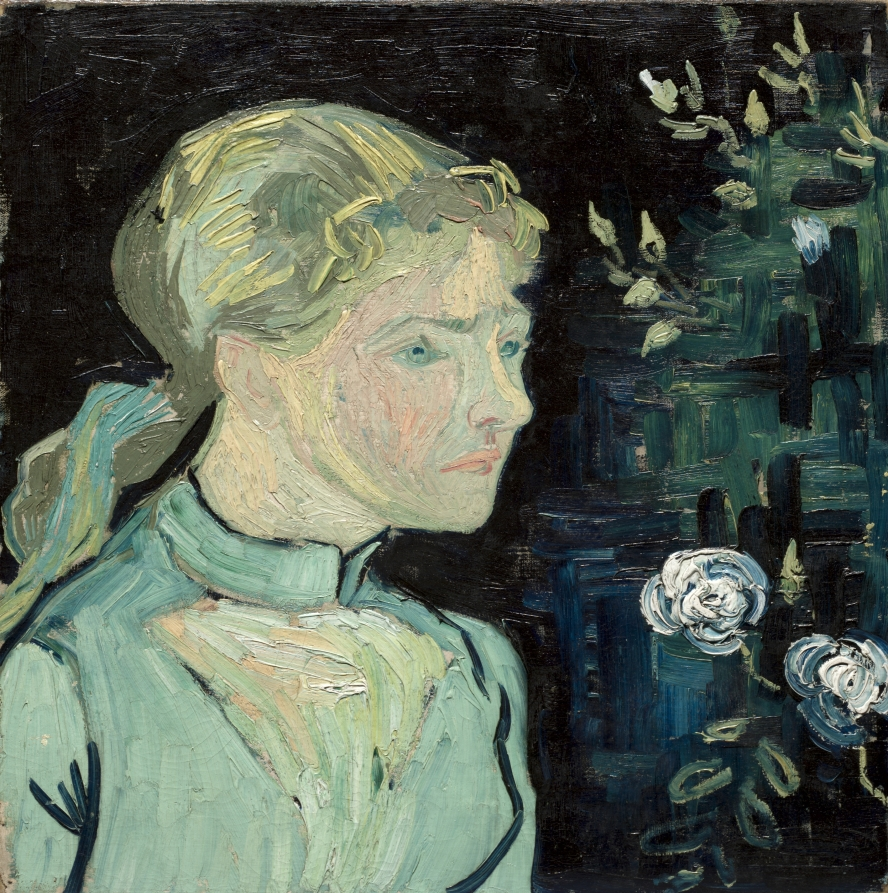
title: Adeline Ravoux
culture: Netherlands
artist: Vincent van Gogh (Dutch, 1853–1890)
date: 1890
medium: oil on fabric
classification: Painting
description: In May 1890, Vincent van Gogh arrived in Auvers, a small town north of Paris, where he rented a room at the inn of Arthur Ravoux. This portrait, completed during the last months of the artist’s life, depicts Ravoux’s 13-year-old daughter, Adeline. Van Gogh wrote that rather than photographic resemblance, he wanted his portraits to convey the “impassioned aspects” of contemporary life through the “modern taste for color.”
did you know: Adeline Ravoux, at age 13, was not pleased with her portrait and did not think the image resembled her. Today, a photograph exists of Adeline in her late seventies and the resemblance is truly remarkable.